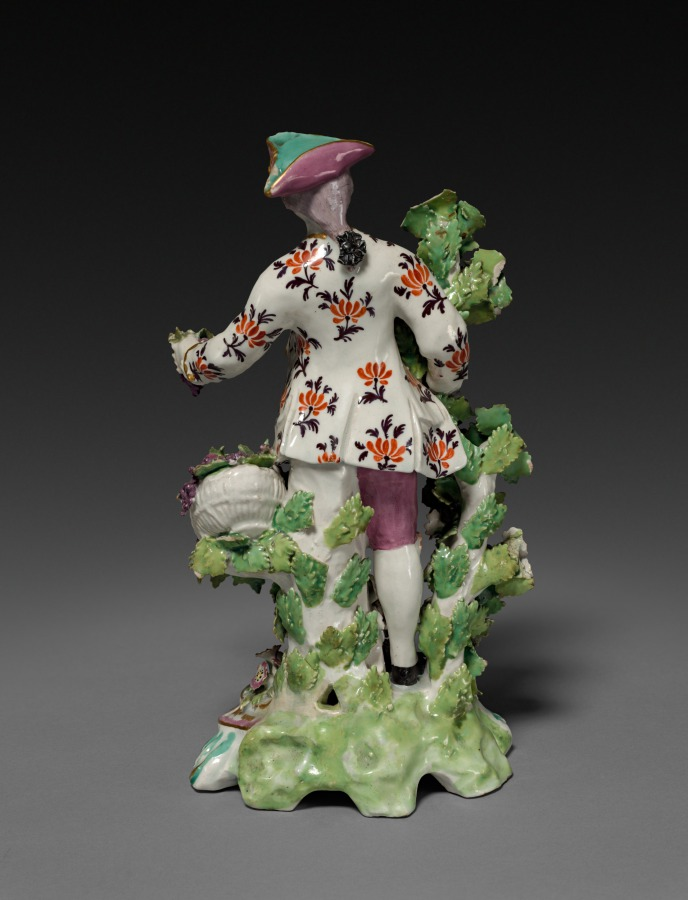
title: Figure of a Gardener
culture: England, London, Bow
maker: Bow Porcelain Factory (British)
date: c. 1765–70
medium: soft-paste porcelain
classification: Ceramic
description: Even though this figure and his counterpart (1945.36) are not accompanied by a sheep, these ceramic sculptures were sometimes known as “Garland Shepherds” during the mid-1700s. The name derived from a similar set produced by one of the Bow Porcelain Factory’s rivals, the Derby Porcelain Factory, in which the male figure holds a lamb. While these two factories often produced similar sets of pastoral, allegorical, biographical, and religious figures, the Bow Factory was known as one of the preeminent porcelain manufacturers, rivaled only by the Chelsea Porcelain Factory, with which Bow would later merge.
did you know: Due to the abundance of grapes, pears, plums, and other fall fruits spilling from the figure’s basket, this Gardener has also been considered a personification of Autumn.